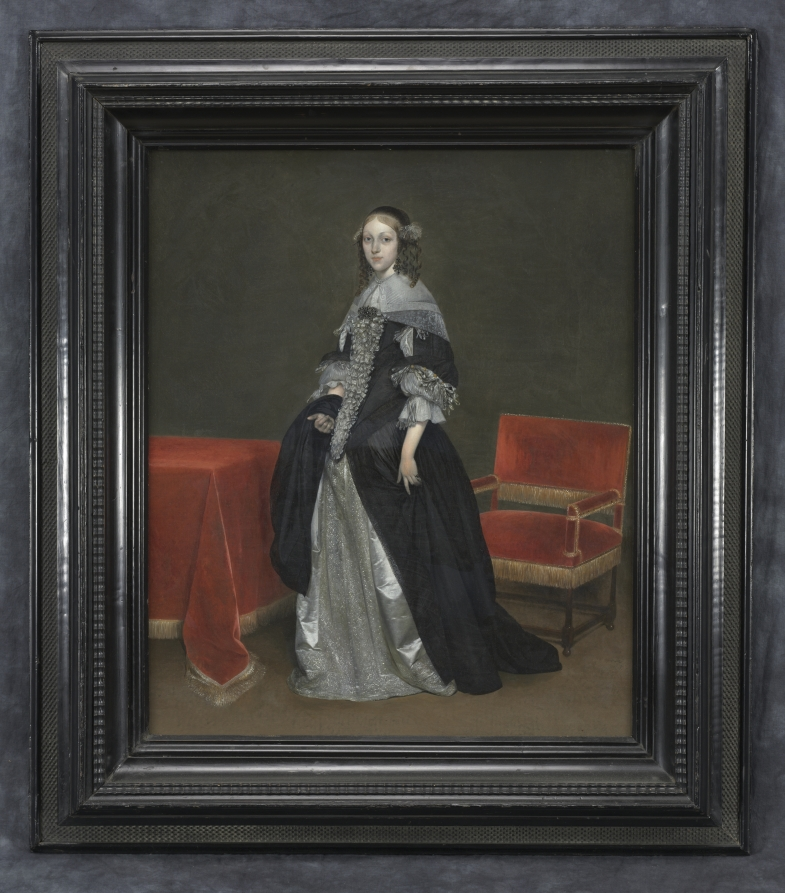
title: Portrait of a Woman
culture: Netherlands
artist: Gerard ter Borch (Dutch, 1617–1681)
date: c. 1665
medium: oil on canvas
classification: Painting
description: Every detail of his subject’s elaborate costume is skillfully recorded: glittering jewels, filmy lace, knots of ribbons, heavy black silk, and shimmering white satin. The ability to recreate satin’s luster was Gerard ter Borch’s particular trademark: he used fine flicks and sweeps of the brush, occasionally adding and wiping away tiny bits of paint to make the white fabric appear to shine. Ter Borch offset the profusion of costume detail by deliberately isolating the figure within a spare setting, allowing us to appreciate the woman’s cool composure. Although her identity is not known, she was undoubtedly a member of the wealthy Dutch elite.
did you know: The pair to this painting (in the National Gallery, London), depicts a man in equally fashionable dress.